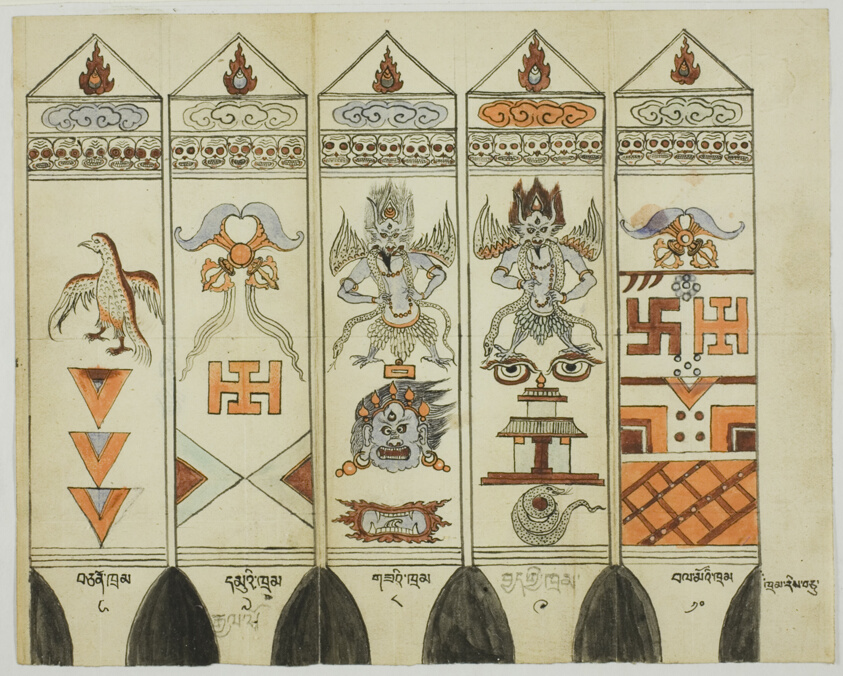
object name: Drawing and Watercolor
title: Part of a Ten-Piece Set of Printed Ritual Stakes (Khram Shing)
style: Himalayan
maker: Mongolia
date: 19th–20th century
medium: Opaque watercolor, watercolor, ink, and graphite on machine-made wove paper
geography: Mongolia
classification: pen and ink drawings; manuscript; asian art